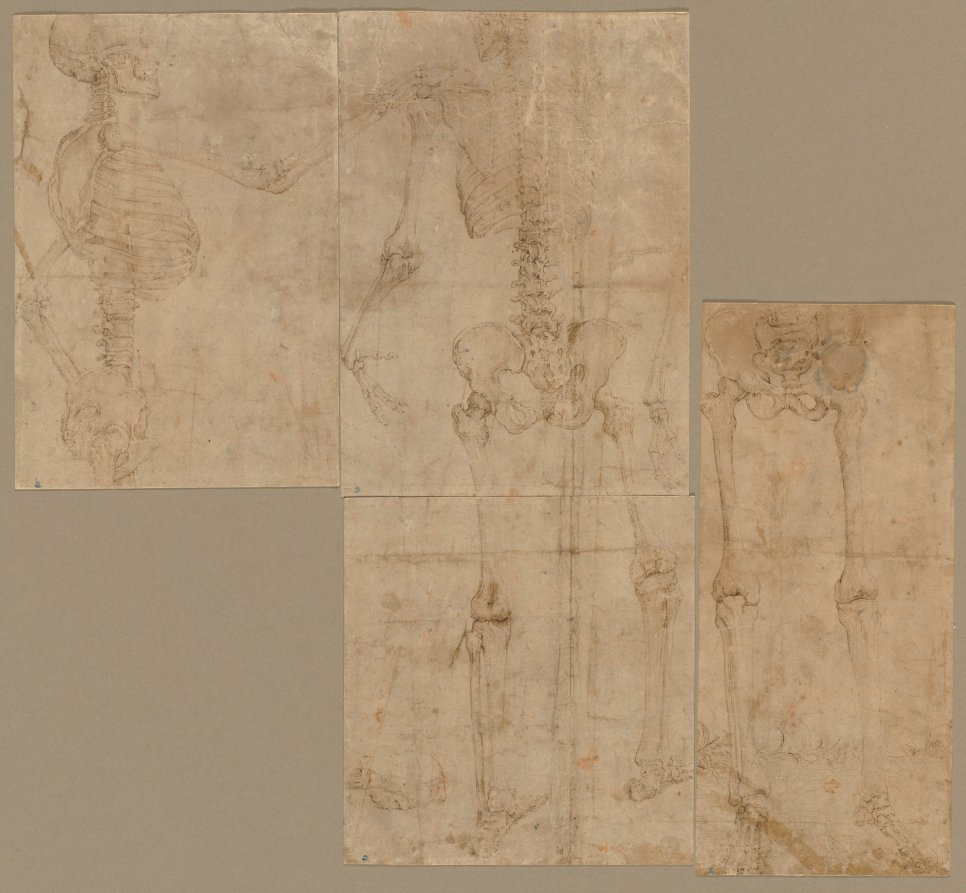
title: Skeleton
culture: Italy, 16th century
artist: Battista Franco (Italian, c. 1510–1561)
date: early 1540s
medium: pen and brown ink; incised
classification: Drawing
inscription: VERSO OF SECONDARY SUPPORT, lower left, in graphite: 4 .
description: Michelangelo was among the first artists in Europe to attend a human dissection and to adopt anatomical knowledge as a necessity for depicting the human figure. These drawings of anatomically accurate skeletons by Battista Franco reflect the increased—and slightly macabre—interest in the interior workings of the human body inspired in part by Michelangelo’s example.